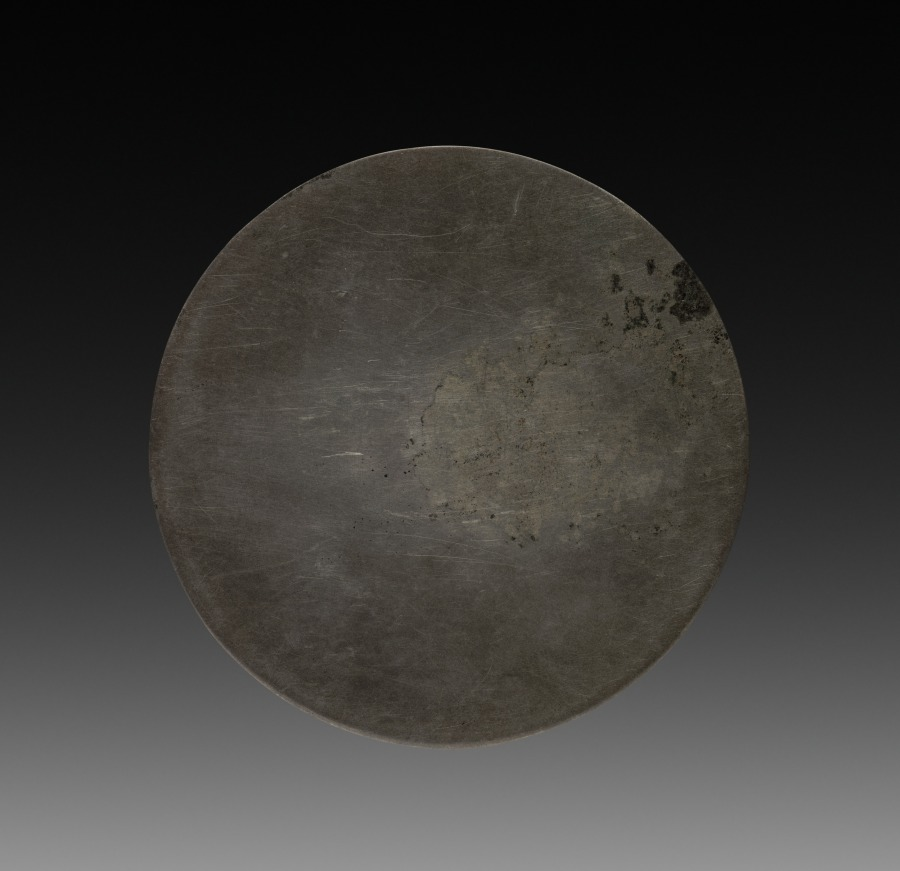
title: Mirror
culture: China, Tang dynasty (618-907)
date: 618–907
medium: bronze with silver inlay in lacquer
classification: Metalwork